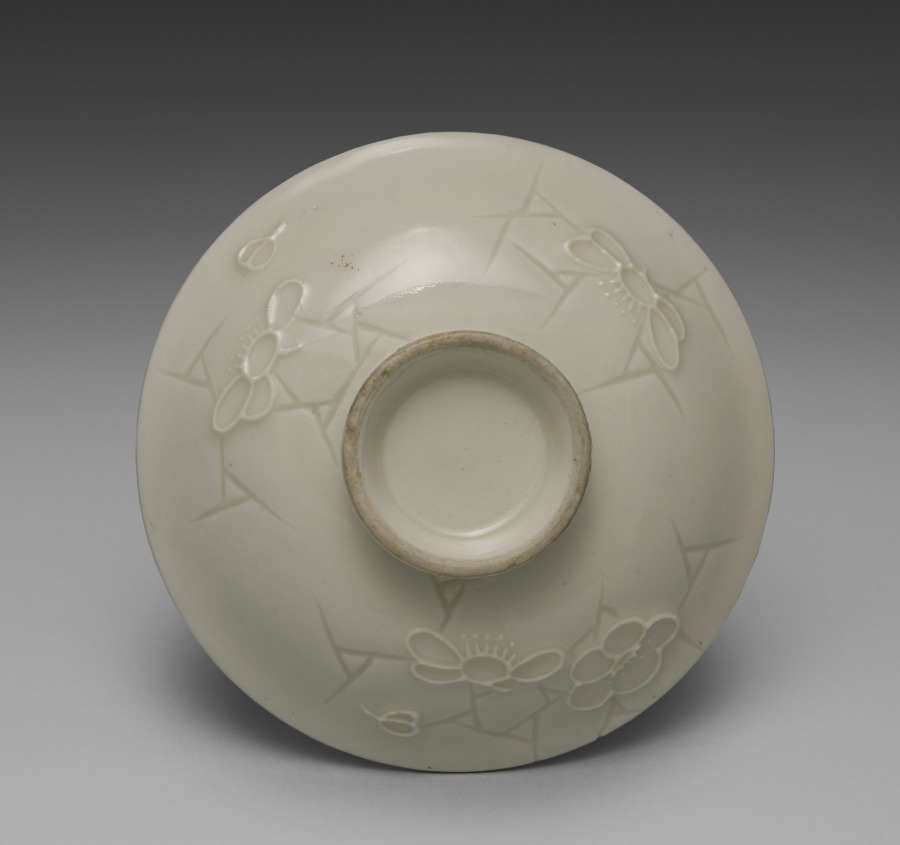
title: Cover for a Bowl from Dining Set with Plum Blossoms and Cracked-Ice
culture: Japan, Meiji period (1868–1912)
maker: Seifū Yohei II (Japanese, 1844–1878)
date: c. 1875–78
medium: Porcelain with molded designs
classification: Ceramic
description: Each item in this set has a delicate low-relief design of flowering plum branches over scattered, intersecting lines meant to resemble the cracked-ice surface of a frozen body of water and is signed on the base in gold pigment. While Yohei II produced many fine works in underglaze blue, like those produced by Kiyomizu Shichibei, he also made works in quite different styles later in his career, from the early 1870 s. In 1873, he was appointed purveyor to the Industrial Center of Kyoto Prefecture, a designation associated with Kyoto’s efforts to reach an international market through the port of Kobe; and from 1875 until his death, he was involved in national-level projects to present Japanese ceramics across the world. It was during this period that Yohei III was apprenticed to Yohei II, and it has been suggested that this set may in fact be an early example of Yohei III’s work, which he signed with his teacher’s name. Decorated with flowers resembling Japanese textile motifs, the set calls to mind the design of Yohei II’s pair of vases with plum blossoms in the Victoria and Albert Museum. Here, the elaborate trees created for a formal public exhibition setting have been translated into the approachable blossoms of the genteel domestic environment. While the designs are consistent across the pieces, each raised flower petal and pistil and each incised line in the ice was done by hand, so the cups, bowls, and dishes are similar yet unique. The bottoms of two boxes once identified the set’s owner, but the information has been deliberately obscured with black ink. However, inscriptions still visible appear to indicate two occasions, once at the end of July 1886 , and once again in June 1916 , when parts of the set were requested from Hokura in Niigata Prefecture. The location corresponds to a neighborhood in the present-day city of Jōetsu. The surname Tsuji 辻 also appears on a paper tag affixed to one of the box cloths. Future research may possibly reveal more about their provenance. A vase by Yohei III in a private collection combines the formal grandeur of the Yohei II vases in the Victoria and Albert Museum with the gentler design of this dining set, placing flowering plum trees against soft, scalloped-edge clouds resembling those in golden screens.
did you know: The dining wares have a creamy white coloration that the four boxes containing them identify as Korean in style.